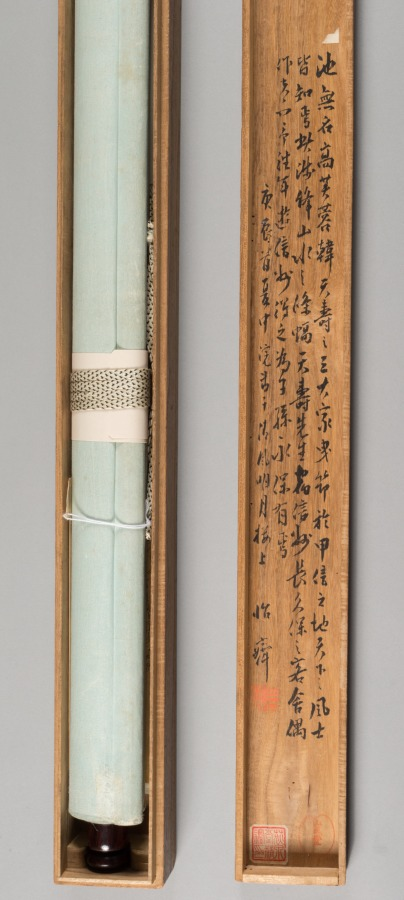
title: Landscape with Gentle Peaks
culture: Japan, Edo period (1615–1868)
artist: Kan Tenju (Japanese, 1727–1795)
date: 1767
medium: hanging scroll; ink and light color on paper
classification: Painting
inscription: 雨過嵐光煙／雲陽樹影諫／夕陽独在左／？卷讀残書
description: A figure sits in a retreat tucked into the mountains near a waterfall. The painter, Kan Tenju, was best known as a calligrapher and seal carver. Of Korean heritage, he was a patron of artist Ike Taiga (池大雅) (1723–1776), and a cousin of Taiga’s student Aoki Shukuya (青木 夙夜) (died 1802). His Chinese-style poem reads as follows: Smoky mist in the mountain reflects light after the rain, Sunlight passes through the clouds to cast shadows of the trees, Alone in the sunset, I read a well-worn book.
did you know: This painting combines image and calligraphy, connected by skillful brushwork.